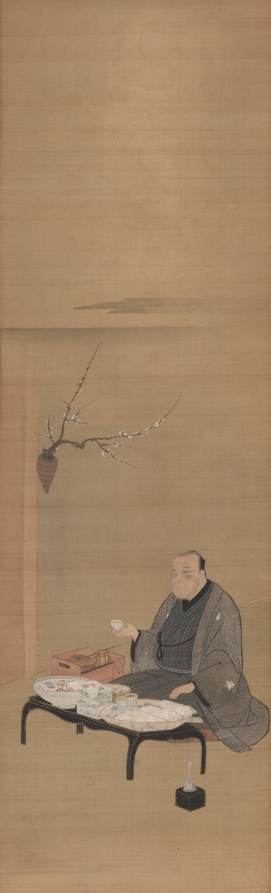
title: Portrait of Kinokuniya Bunzaemon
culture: Japan, Edo period (1615–1868)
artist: attributed to Utagawa Toyokuni (Japanese, 1769–1825)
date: early 1800s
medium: hanging scroll; ink and color on silk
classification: Painting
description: Kinokuniya Bunzaemon was one of Edo’s first millionaire merchants. He made his fortune selling lumber, a lucrative and expanding business in Edo that was often ravaged by fire. Well known for his extravagance, he entertained lavishly and was a generous patron of the theater. He was said once to have set gold and lacquer cups afloat on the Sumida River to amuse people downstream. This painting may be an imaginary portrait, as Kinokuniya Bunzaemon died in 1734—35 years before the artist Toyokuni was born. A patron of the entertainment district and a gourmand, Kinokuniya probably enjoys a New Year’s meal including sushi served on blue-and-white porcelain. The square, tiered box was typically used for serving food for the New Year.